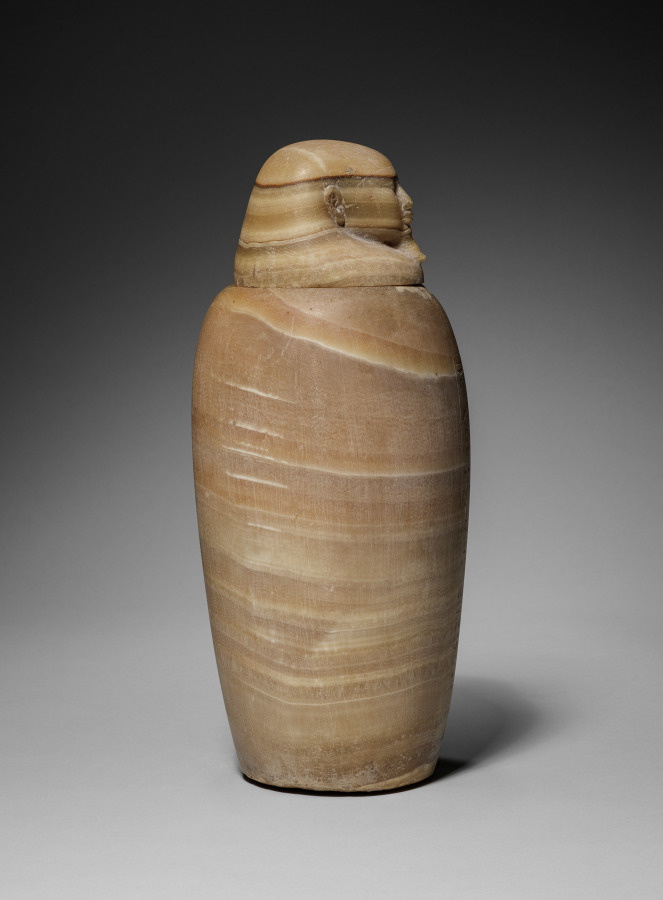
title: Canopic Jar with Man's Head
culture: Egypt, Late period (715–332 BCE), Dynasty 26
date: 664–525 BCE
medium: travertine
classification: Funerary Equipment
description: In the process of mummification, the liver, lungs, stomach, and intestines were removed, separately embalmed, and stored in specialized jars known as canopic jars (after a sailor in Greek mythology, who died at the town of Canopus in the Nile Delta and was worshipped there in the form of a human-headed jar). Each organ was identified with one of four funerary deities collectively known as the Sons of Horus: the liver with Imsety (man's head), the lungs with Hapy (baboon's head), the stomach with Duamutef (jackal's head), and the intestines with Qebehsenuef (falcon's head). It was their duty to protect the deceased and restore to him his body parts in the hereafter.